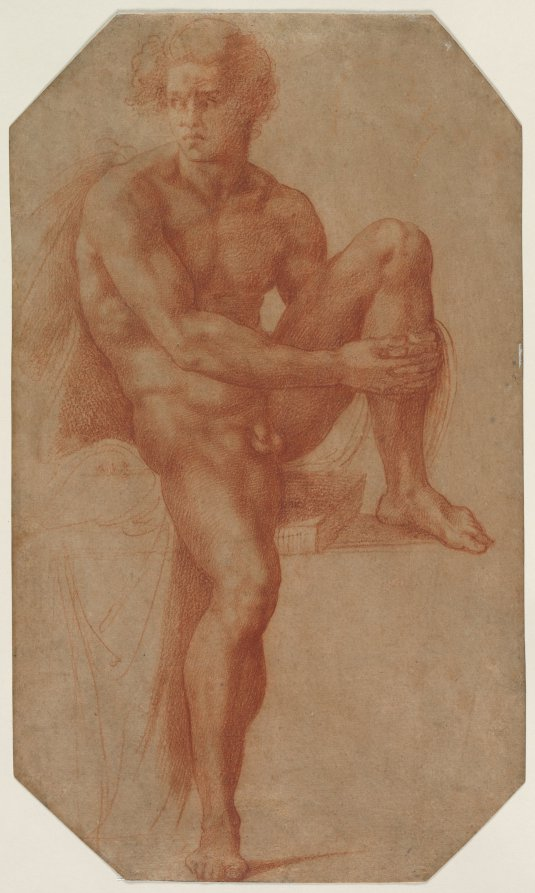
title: Seated Male Nude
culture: Italy, 16th century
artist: Baccio Bandinelli (Italian, 1493–1560)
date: c. 1516–20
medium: red chalk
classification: Drawing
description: Both Baccio Bandinelli and Michelangelo made figure drawing the foundation of their artistic and inventive processes. In this drawing, Bandinelli reimagined one of Michelangelo’s ignudi, the athletic male nudes that decorate the Sistine Chapel ceiling. Probably drawing from a live model, Bandinelli combined controlled, defined lines and smudges to create a massively muscled form, that, like Michelangelo’s figures, refers to ancient sculpture as well as to knowledge of anatomy. His use of red chalk—Michelangelo’s preferred medium for sketching the ignudi—suggests that he sought to compare his own prowess in the medium to that of the better-known master.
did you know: Bandinelli's drawing of a moody nude combines his knowledge of ancient sculpture and paintings by Michelangelo with observation from life.